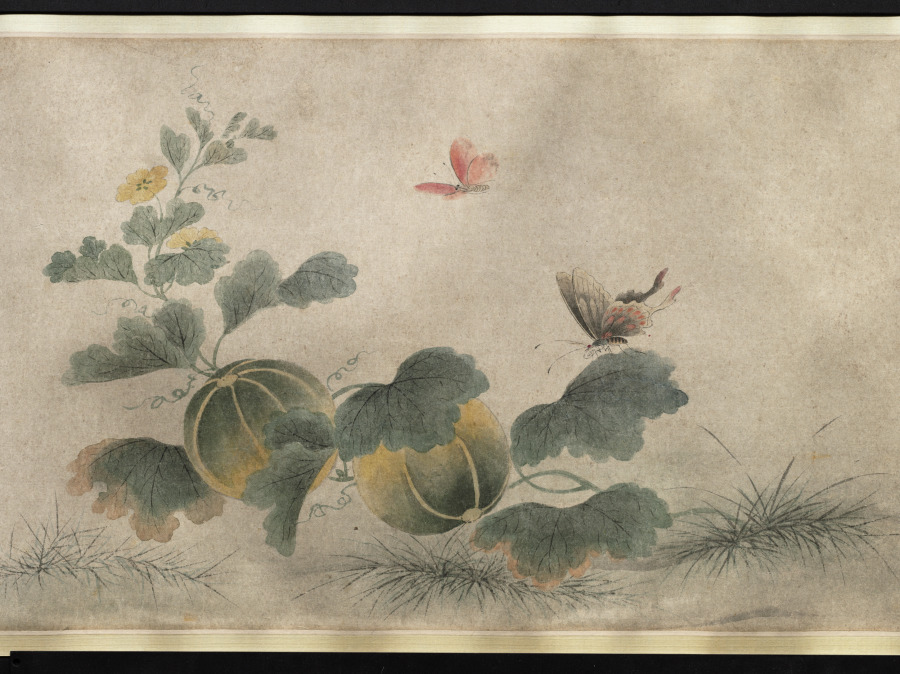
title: Insects and Flowers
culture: China, Qing dynasty (1644-1911) or Republican period (1912-49)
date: c. 1900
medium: Handscroll, ink and color on paper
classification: Painting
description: More than 26 feet long, this scroll presents insects, reptiles, and plants in delicate brushwork and pale colors, referring in style to earlier Southern Song dynasty (1127–1279) bird-and-flower paintings. Upon closer inspection, ants dismember a butterfly and reptiles wait to ambush their prey. An inscription at the end of the painting gives us an idea of its meaning: Attributed to the Qing dynasty scholar Zhang Xigeng (張錫庚, 1801–1861), the inscriber relates the work to an earlier painting by Qian Xuan (錢選, c. 1235–before 1307) and further suggests that the painting may allude to the relentlessness of natural selection. By drawing a parallel to tumultuous episodes in Chinese history, the writer might even hint at the domestic rebellions and the aggression of Western powers against China in his lifetime, particularly the Opium Wars (1839–60).